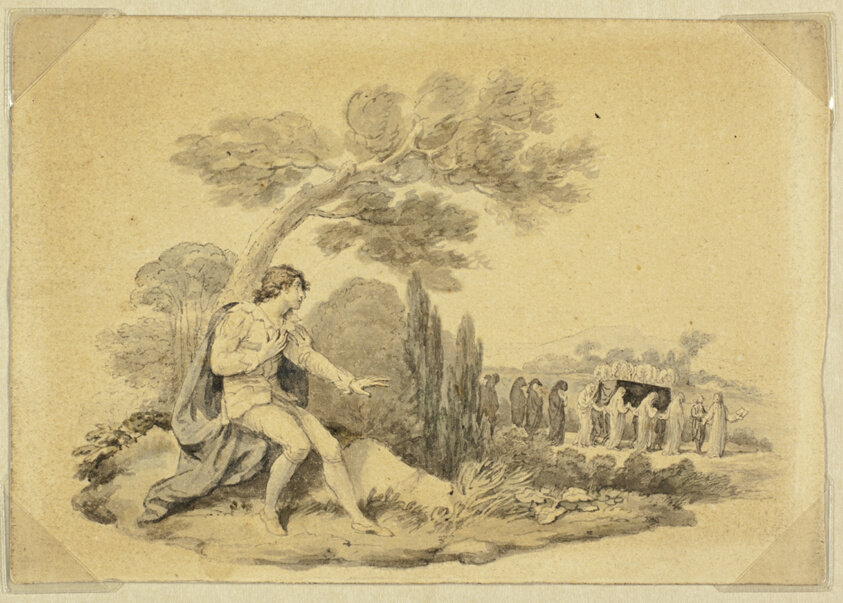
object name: Drawing and Watercolor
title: Each Moment Has Its Sickle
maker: Charles Reuben Ryley (English, c. 1752-1798)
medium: Watercolor on tan wove paper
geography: England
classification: watercolor; drawings (visual works); prints and drawing